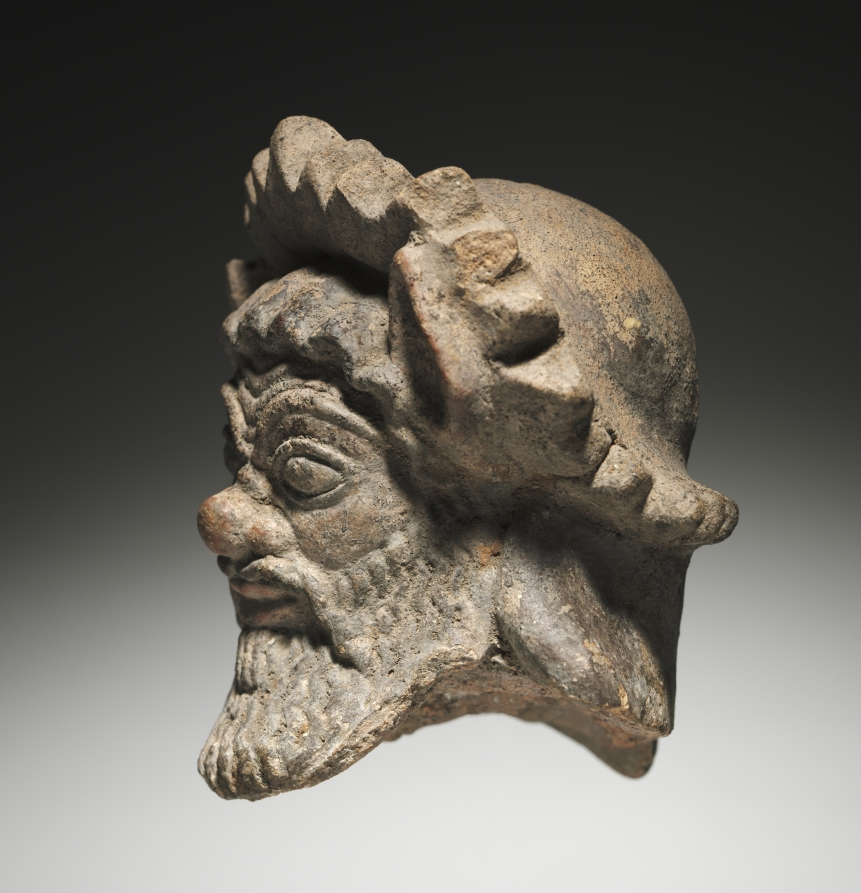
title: Satyr Head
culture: Etruscan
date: 500s BCE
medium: terracotta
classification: Sculpture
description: This head of an equine-eared satyr likely comes from a mold-made terracotta antefix. He has a wide nose, a furrowed brow, and almond-shaped eyes. Traces of pigment remain in the wavy incised beard and lips. A garland, perhaps made of pointed leaves, adorns the hair. It was likely part of a larger Etruscan temple antefix of an intertwined satyr and maenad because of its identical nature to other satyr heads from complete antefixes.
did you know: Satyrs are nature spirits and followers of the wine god Dionysos.